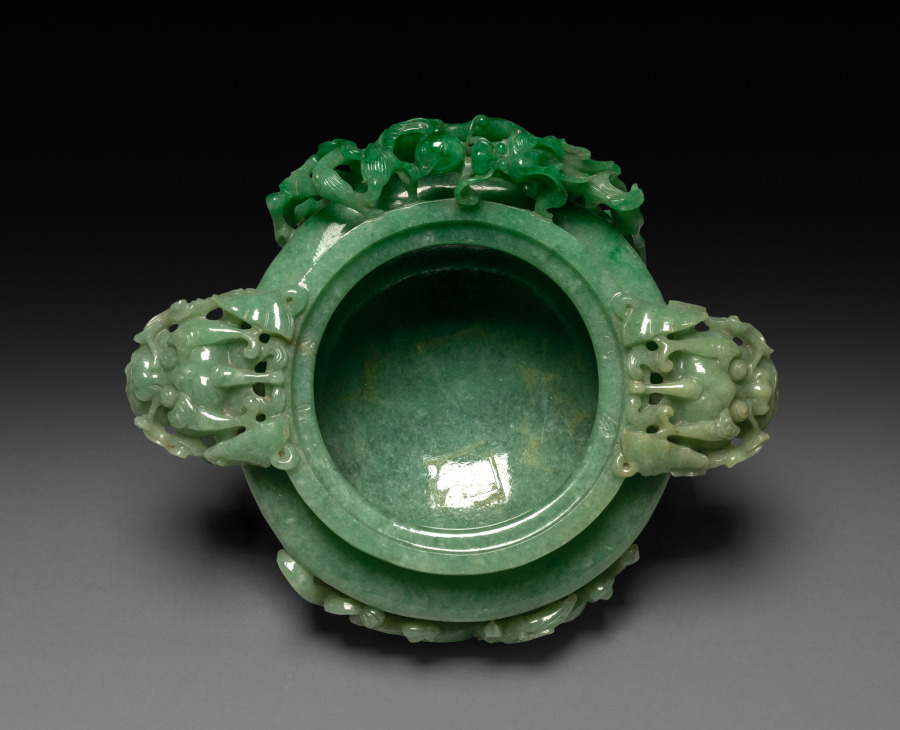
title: Three-Sectional Altar Group: Koro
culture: China, Qing dynasty (1644-1911)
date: 1644–1911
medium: jade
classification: Jade